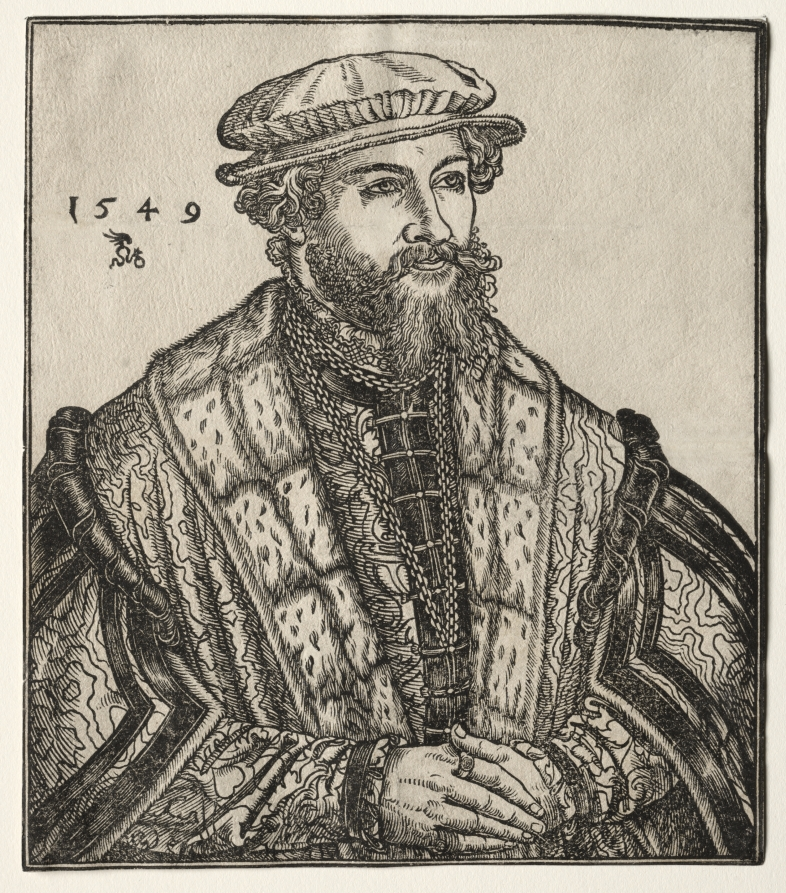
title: Dr. Christian Brück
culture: Germany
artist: Lucas Cranach (German, 1515–1586)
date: 1549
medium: woodcut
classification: Print